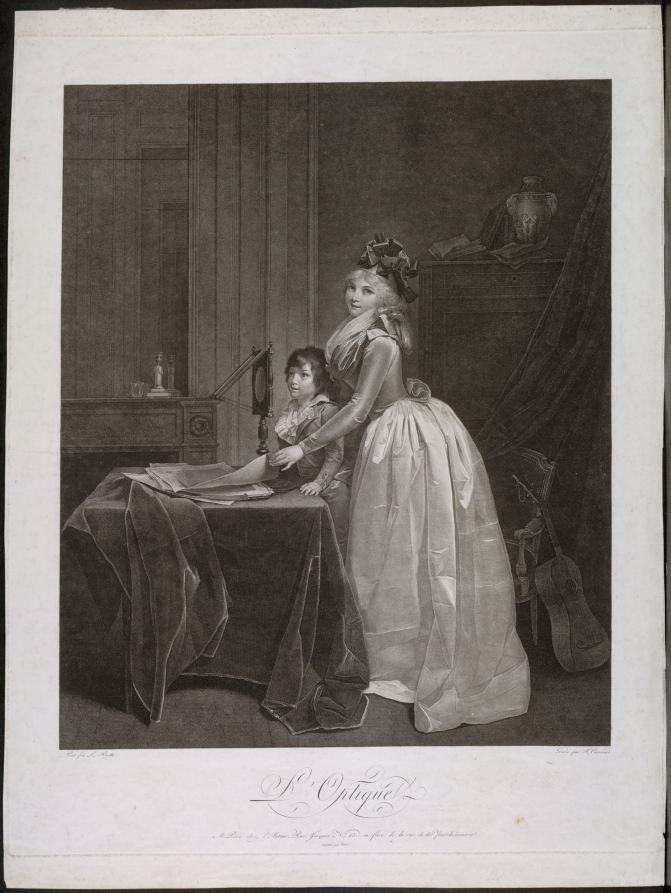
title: The Optical Viewer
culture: France, 18th century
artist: Frédéric Cazenave (French, active 1793–1843)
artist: after Louis Léopold Boilly (French, 1761–1845)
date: c. 1793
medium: Chalk-manner etching and engraving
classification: Print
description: In this print, a fashionable woman and a boy look at prints through an optical viewer known as a “zograscope.” This form of entertainment, popularized during the 1700s, was equipped with a concave lens that made images appear three-dimensionally. Special prints called vues d’optiques, or “perspective views,” were designed to enhance the sense of three-dimensionality, creating an immersive experience. Most of the scenes depicted cities or memorable occurrences, allowing the spectator to witness important sites and events from the comfort of their own home.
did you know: Optical devices frequently appear in Louis Léopold Boilly’s work.